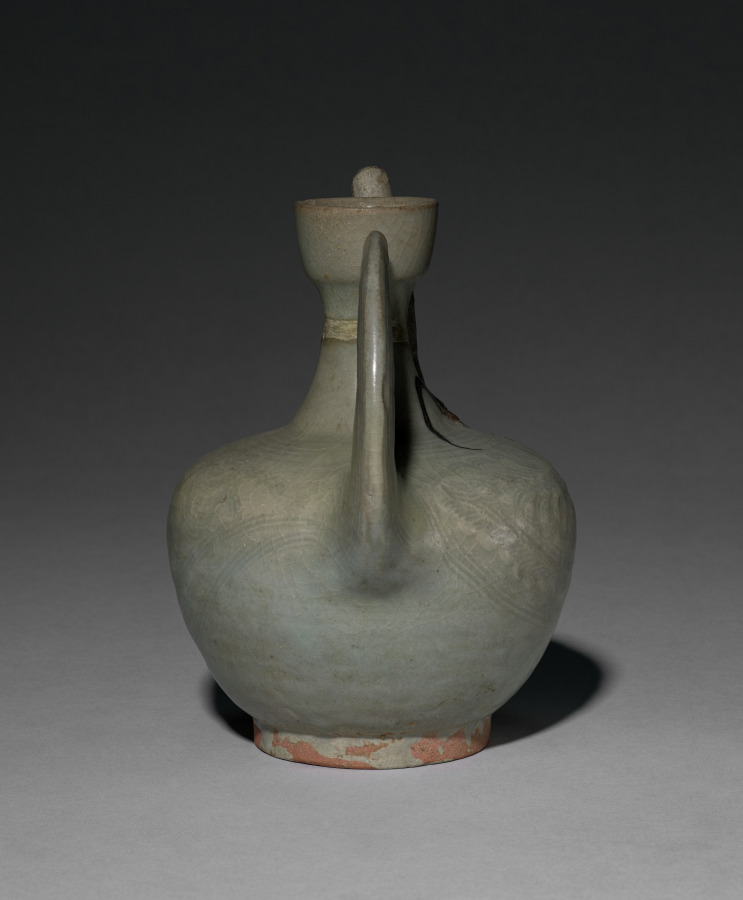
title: Pouring Vessel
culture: Siam, Sawankhalok ware, late 13th-14th Century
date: late 1200s-1300s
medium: stoneware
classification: Ceramic